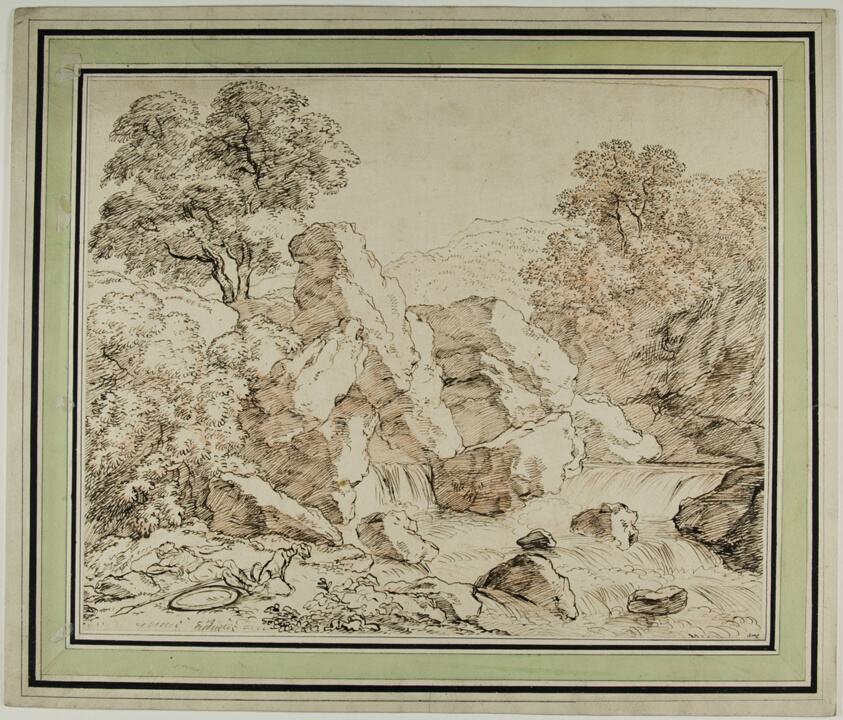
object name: Drawing and Watercolor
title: Warrior and Dog Resting by Rocky Rapids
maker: Attributed to Franz Kobell; German, 1749-1822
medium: Pen and brown ink, over red chalk, on buff laid paper, laid down on board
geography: Germany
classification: pen and ink drawings; drawings (visual works); prints and drawing